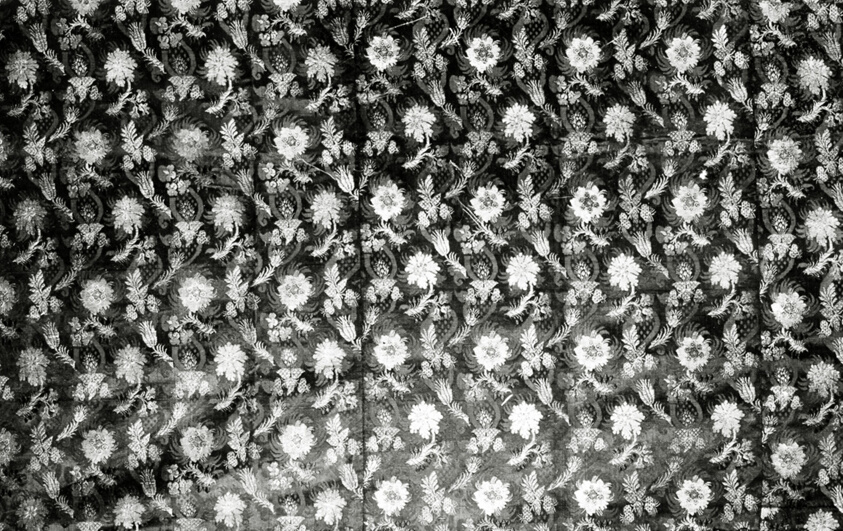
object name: Textile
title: Panel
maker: France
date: 1680/1700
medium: Silk and gilt- and silvered-metal-strip-wrapped silk, warp-float faced 7:1 satin weave with supplementary brocading wefts and self-patterned by areas of weft-float faced 1:3 'S' weft chevron twill weave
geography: France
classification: textile; weaving